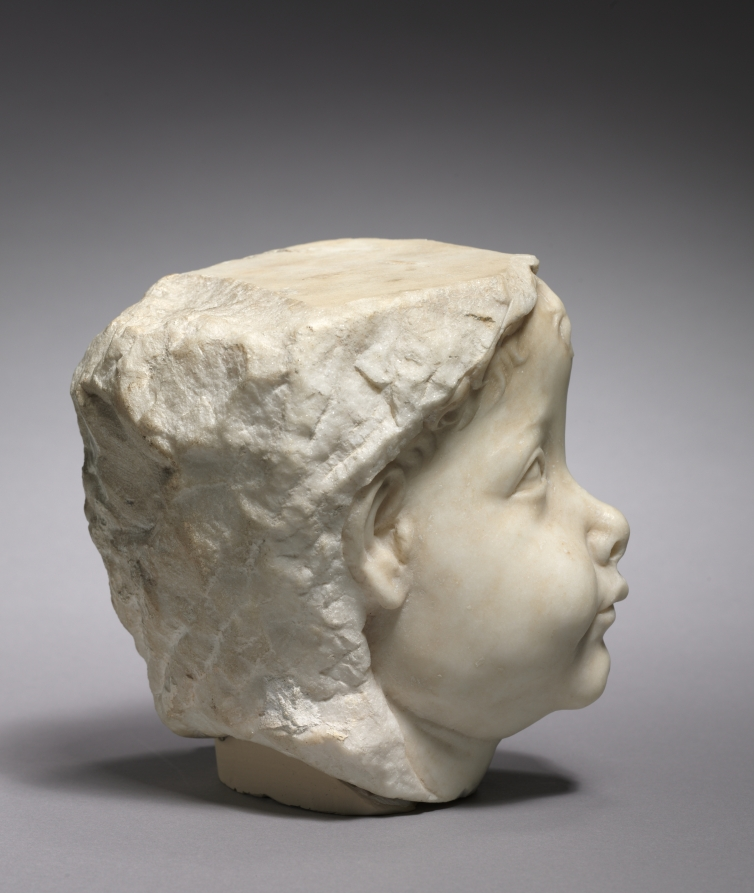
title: Head of a Putto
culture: Italy, Florence, 15th century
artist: follower of Desiderio da Settignano (Italian, 1429/32–1464)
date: 1450–1475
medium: marble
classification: Sculpture